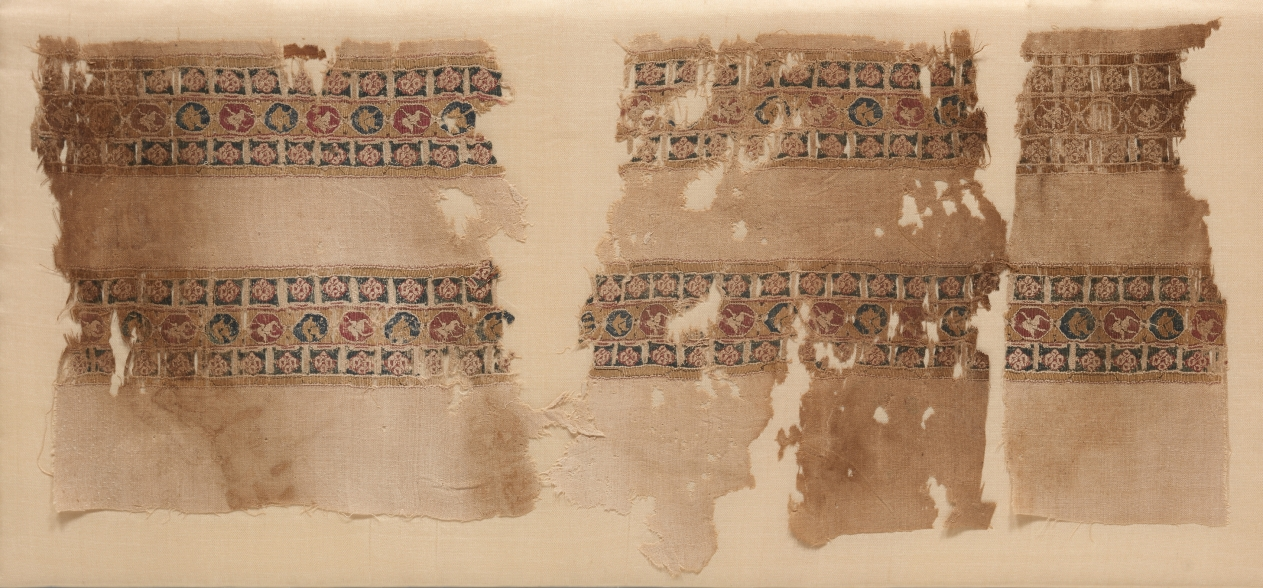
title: Fragment of Tiraz-Style Textile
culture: Egypt, Fatimid period, 12th century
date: 1100s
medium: tabby ground with inwoven tapestry ornament; linen and silk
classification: Textile